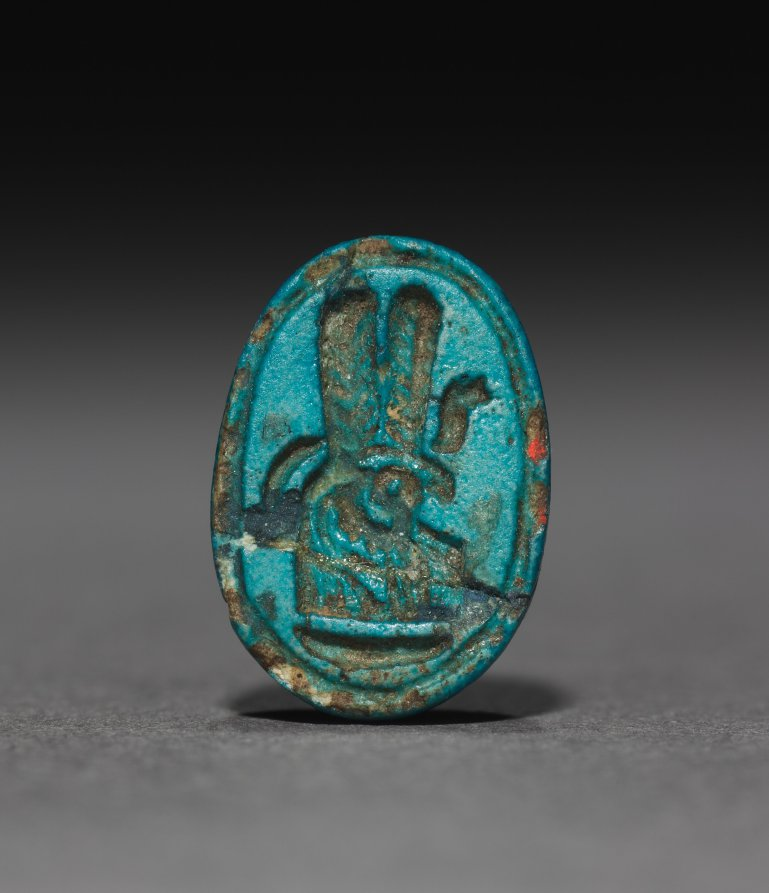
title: Scarab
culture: Egypt, New Kingdom (1540–1069 BCE), Dynasty 18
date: 1350–1296 BCE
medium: turquoise faience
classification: Scarabs